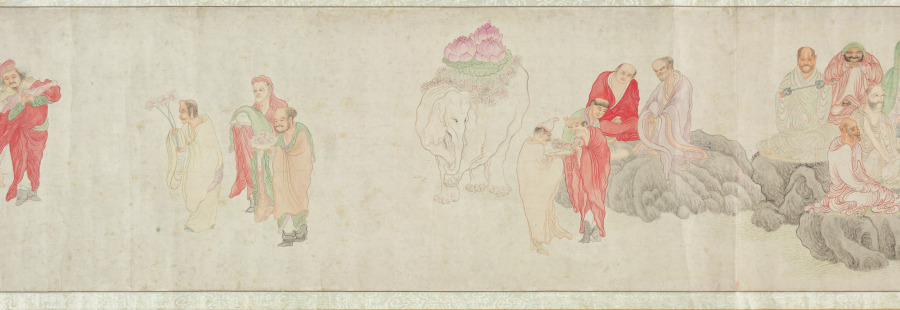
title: The Five Hundred Arhats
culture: China, Ming dynasty (1368–1644)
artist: Wu Bin (Chinese, active c. 1591–1626)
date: 1591–1626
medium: Handscroll; ink and color on paper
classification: Painting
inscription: 枝隱頭陀吳彬齋心拜寫 [印]吳彬之印; 文中父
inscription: 7 seals of Qianlong emperor (r. 1736–95): Gu xi tian zi 古希天子; Shou 壽; Qianlong jian shang 乾隆鑑賞; San xi tang jing jian xi 三希堂精鑑璽; Yi zi sun 宜子孫; Tai shang huang di zhi bao 太上皇帝之寳; Qian qing gong bao 乾清宮寶.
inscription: 6 seals of Cheng Qi 程琦 (1911–1988): Ke an geng zi wu shi yi hou suo de ming ji 可菴庚子五十以後所得名跡; 5 other Cheng Qi seals.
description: More than 66 feet long, this handscroll depicts 447 luohans, 72 attendants, and the bodhisattva of compassion at its very end. Luohans (arhats in Sanskrit), disciples of the Buddha and protectors of the Buddha’s law, possess supernatural powers and take on myriad external appearances. The amusing assortment of characters are engaged in an array of religious, secular, and miraculous activities. The painter used stylistic features borrowed from earlier artists, carefully controlled lines, and refined coloring. Wu Bin was a lay Buddhist and depicting this sort of image was part of a religious practice seeking understanding of the Buddha’s teaching.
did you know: Far advanced on the path to enlightenment, arhats have the capacity to tame tigers, free dragons, and to float on water or in the air.